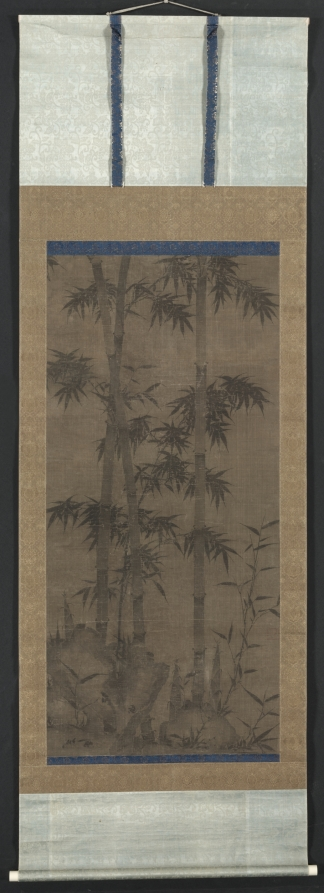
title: Bamboo in Four Seasons: Autumn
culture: China, Yuan dynasty (1271-1368)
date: 1279–1368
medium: hanging scroll, ink on silk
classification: Painting